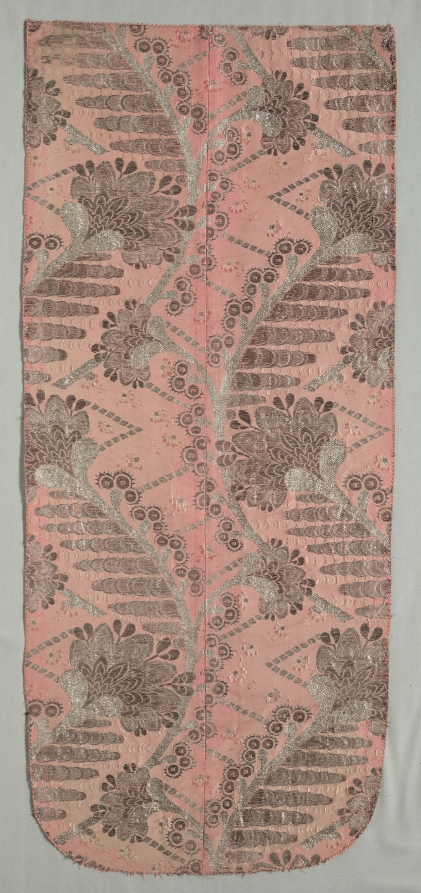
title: Fragment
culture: France, 18th century, Period of Louis XV (1723-1774)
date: 1723–1774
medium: tabby, brocaded; silk and silver filé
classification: Textile